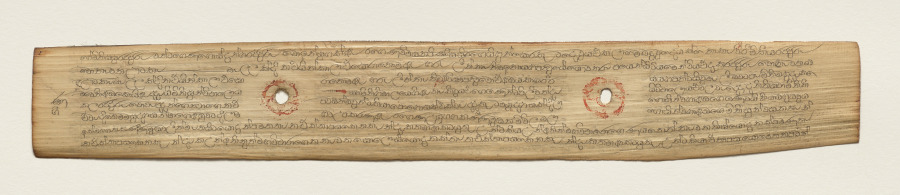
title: Leaf from a Buddhist Manuscript (recto)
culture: Sri Lanka, Singhalese, Late 17th century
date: c. 1700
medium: fiber paper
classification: Manuscript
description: Palm leaf material is still used for manuscripts in Sri Lanka. The palm leaves are prepared first by boiling them, drying them in the sun, and then rubbing them with oils. Scribes then use a metal stylus to incise the text. Then charcoal powder is wiped across the pages, filling in only the inscribed lines.